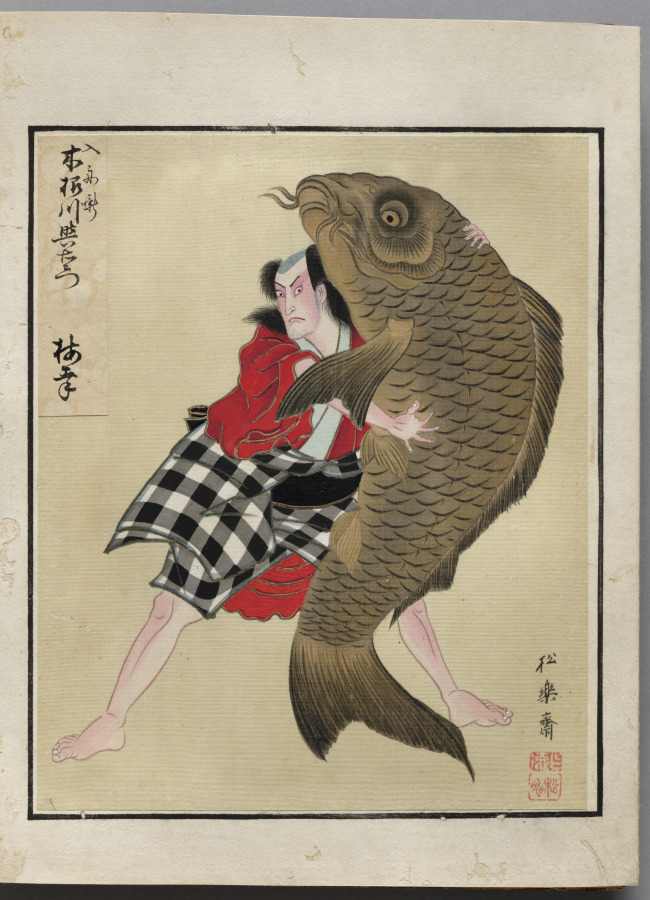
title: Double-Leaf from Album of Actor Portraits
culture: Japan, Edo period (1615–1868)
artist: Shōrakusai (Japanese)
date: c. 1790–1810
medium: double-leaf from an accordion-style album; ink and color on silk (right)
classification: Bound Volume